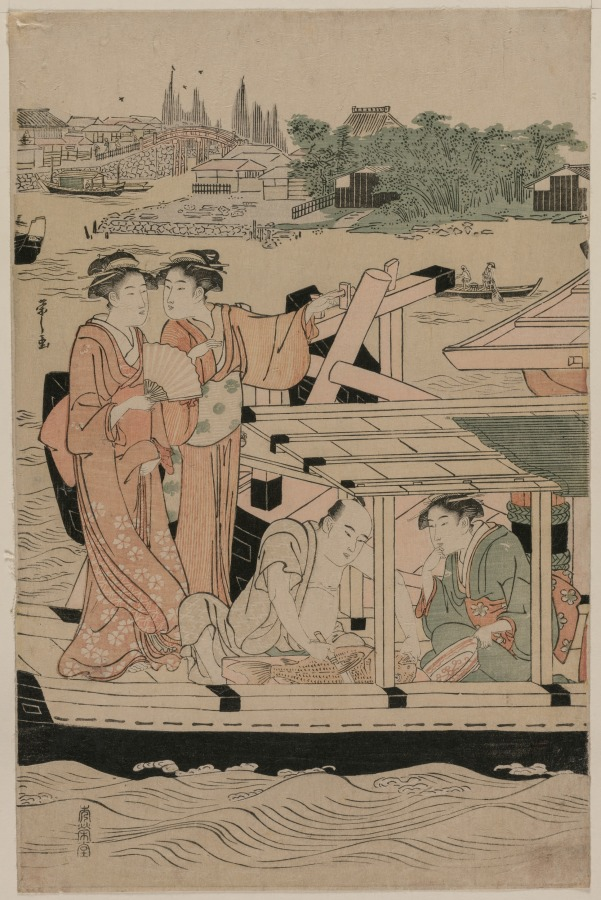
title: Leftmost Print from Pleasure Boats on the Sumida River beneath Shin-Ōhashi Bridge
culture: Japan, Edo period (1615–1868)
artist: Chōbunsai Eishi (Japanese, 1756–1829)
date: c. 1792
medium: woodblock print from a pentaptych; ink and color on paper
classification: Print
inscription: Signature: Eishi ga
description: Eishi was both a painter and printmaker. His figures are characterized by elegant lines and flowing drapery.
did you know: This is the leftmost print of a composition comprising five prints, but the museum has only two of them.